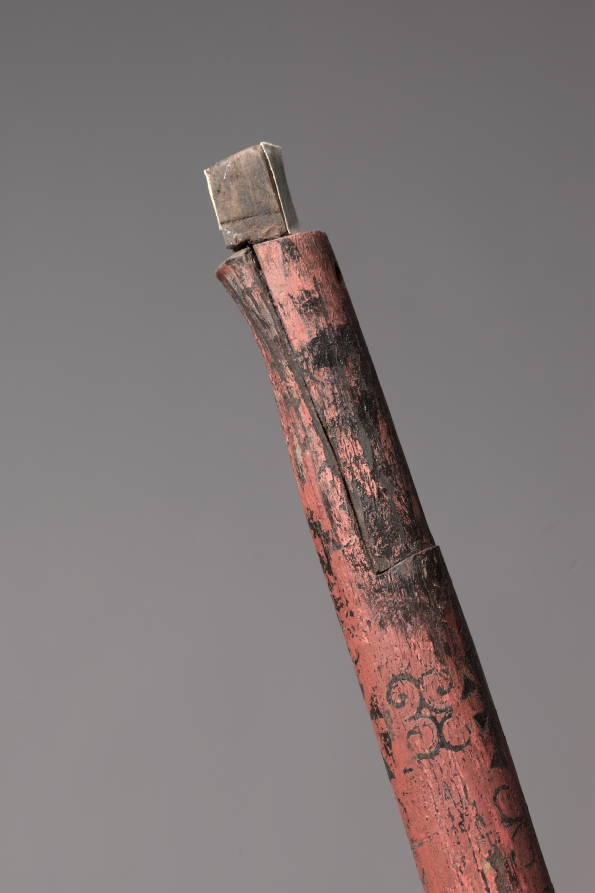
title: Cranes and Serpents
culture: China, reportedly from Hunan province, Changsha, Warring States period (475–221 BCE), State of Chu (c. 1046–223 BCE)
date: 475–221 BCE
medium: lacquered wood with polychromy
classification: Sculpture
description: A different style of ritual art developed in the state of Chu in South China. In addition to bronze vessels, lacquered wood artifacts expanded the repertory of ritual implements. This extraordinary sculpture was probably a drum stand for supporting a suspended drum in ritual ceremonies. It is unique among other excavated drum stands of the Chu, which typically show two birds standing on tigers. The theme of the bird stepping on the serpent was common in the Chu visual culture. Yet the slender proportions and seemingly flimsy structure of this particular set raise the question of whether it was utilitarian or mostly served symbolic functions in the tomb. The birds' and serpents' bodies have designs painted in red lacquer and yellow pigment against the black lacquer. Scientific analyses confirm the additional use of a blue or green pigment that has been discolored over time.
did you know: The cranes' long necks allowed a lightweight drum to be suspended from strings through the beaks, while the densely intertwined snakes provided a weighty base to stabilize the object during musical performances.